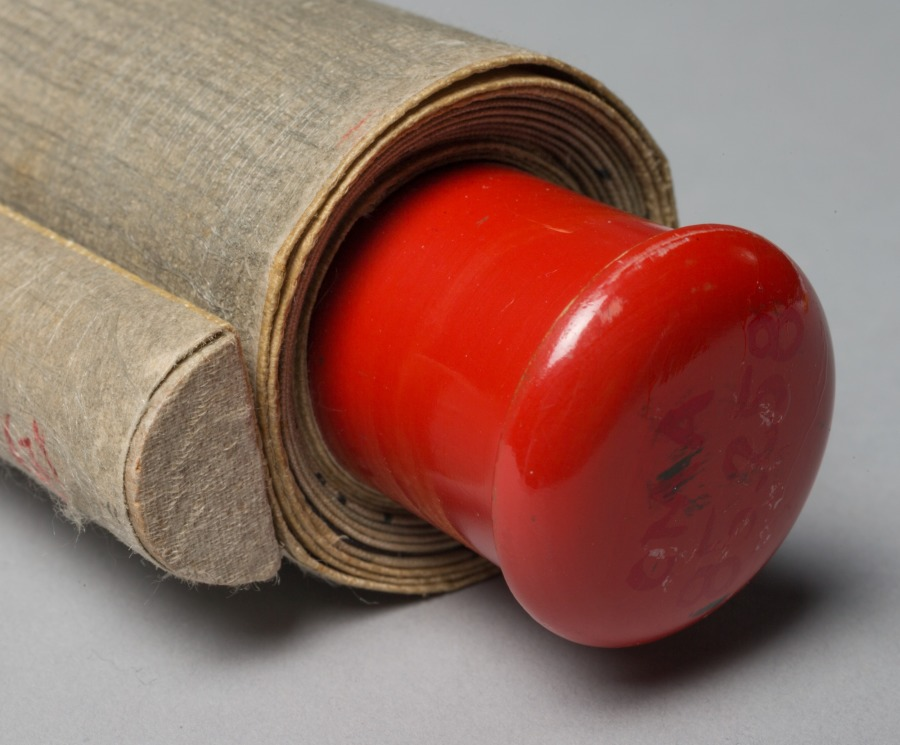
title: Playing the "Hand Game"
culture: Japan, Edo period (1615–1868)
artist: Hasegawa Yasumasa (Japanese)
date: c. 1760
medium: hanging scroll; ink and color on paper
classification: Painting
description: This scene depicts three people playing a game in which three players make hand gestures simultaneously. The relationship among the gestures determines the winner. Known as hand games, during the eighteenth century they were popular in Japan among courtesans. In this version, the contestants use both hands, indicating a special variation such as the fox hand game, which features gestures for a fox, a village leader, and a hunter.